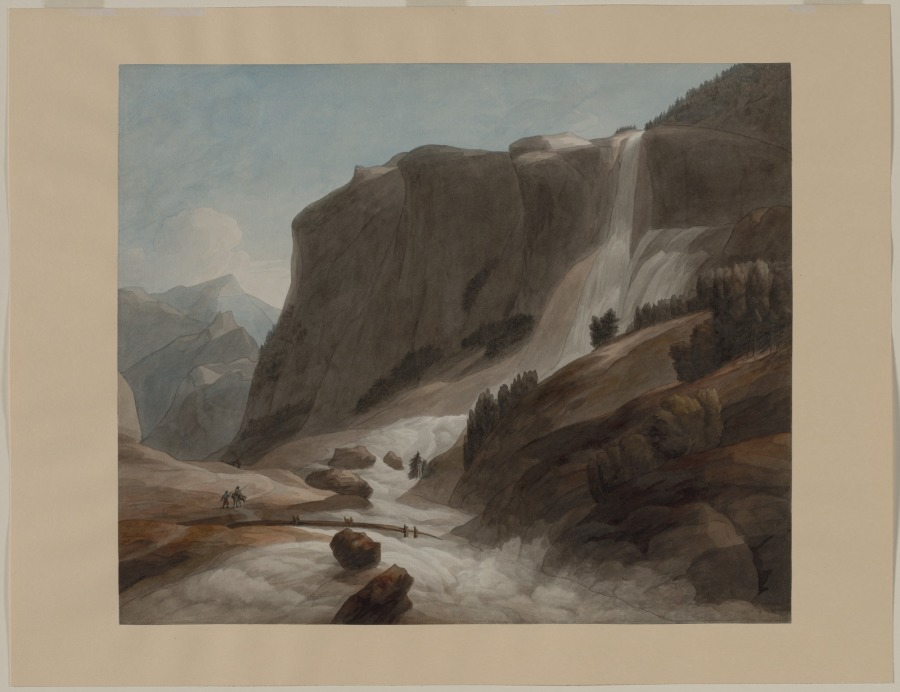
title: Waterfall between Chiavenna and Mount Splügen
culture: England, 18th century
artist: Francis Towne (British, 1739/40–1816)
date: 1784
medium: watercolor with graphite, point of brushwork, and selective glazing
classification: Drawing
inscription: signed and dated, in pen and brown ink, at lower left: Francis Towne / dell. 1784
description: Francis Towne spent a year painting the architectural wonders of Rome and its environs on what was to be his only trip to the Continent. On the journey back to England, he traveled over the Alps, visiting the Italian Lakes, crossing over the Splügen Pass into Switzerland, finally arriving in Geneva. His distinctive style, characterized by an austere simplicity of vision, found its fullest expression in his Alpine views, described by one scholar as "unquestionably among the greatest by any 18th-century artist of mountain scenery." Against the earth tones of the brooding cliffs, the crash of the waterfall is like a white explosion.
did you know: This drawing once belonged to Paul Oppé, one of Britain's most esteemed art historians and a legendary authority on English drawings.